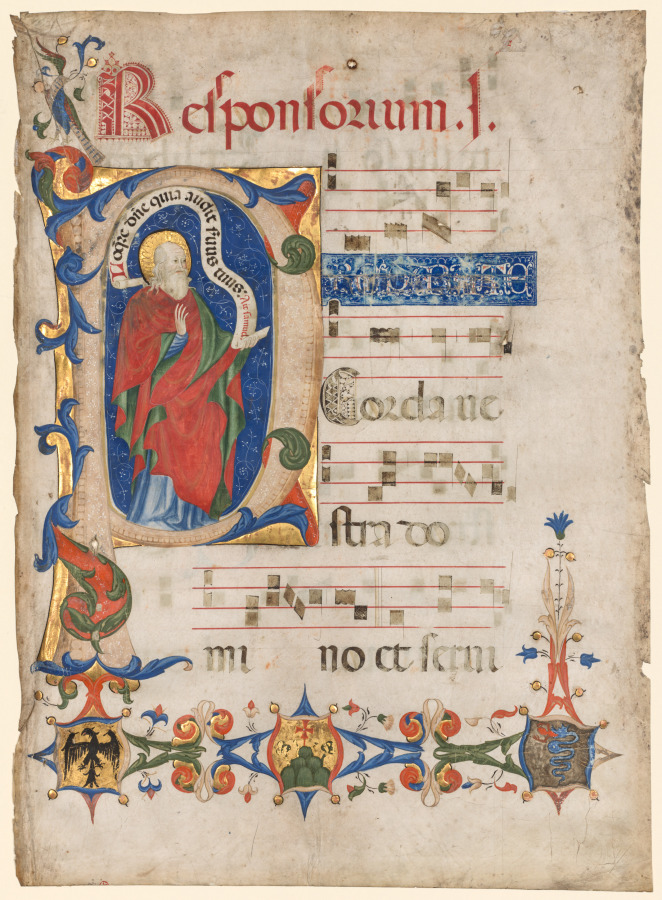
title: Leaf from an Antiphonary: Historiated Initial P with the Prophet Samuel; Arms of the Visconti Family and the Olivetan Order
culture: Italy, Milan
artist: Olivetan Master (Italian)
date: c. 1439–47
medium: ink, tempera and gold on vellum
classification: Manuscript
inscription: Responsorium 1 Loquie domine quia audit servus tuus : Ait Samuel Preparate Corda vestra domino et Servite illi soli et liberabit nos de manibus inimicorum vestorum Confitemini ad deum...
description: This leaf is distinguished by a large initial P depicting Samuel, the last and one of the greatest of Israel’s judges. It introduces the text Preparte corda vestra domino et servite (“Prepare your hearts for the Lord and serve”). In the lower margin are the arms of the Visconti family, rulers of Milan, featuring an eagle (left) and a coiled serpent (right). At bottom center is the emblem of the Olivetan Order, a reformed branch of the Benedictines founded in 1319 known as the “white monks.” The Olivetan monastery in Milan was founded in 1400 and it appears that this leaf belonged to a set of choral books presented to the monastery by one of the Visconti, perhaps about 1439–47. The so-called Olivetan Master takes his name from a luxuriously illustrated psalter made for the order’s monastery in Milan, where he was undoubtedly a monk.